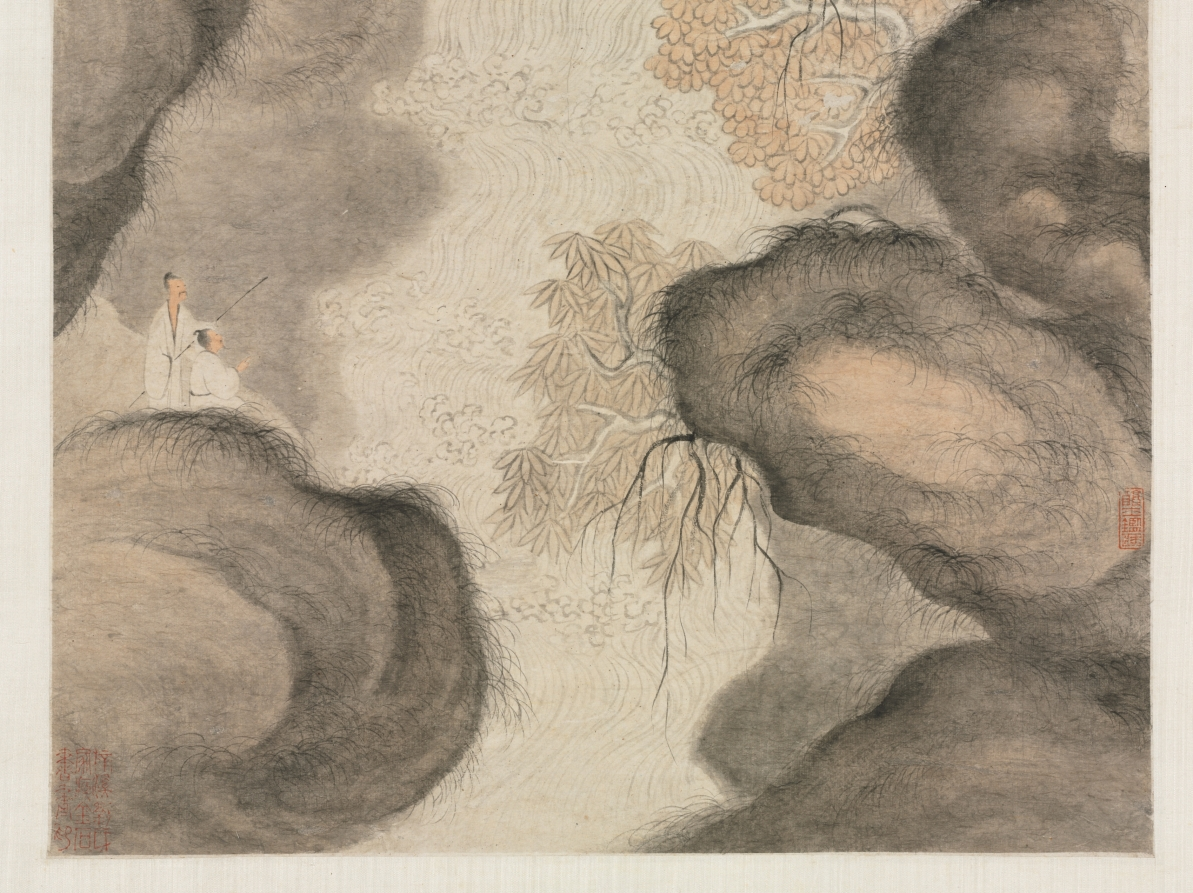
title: Nine Dragon Pool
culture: China, Qing dynasty (1644-1911)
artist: Mei Qing (Chinese, 1623–1697)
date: 1690s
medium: hanging scroll, ink and light color on paper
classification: Painting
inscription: 太古蟄龍醒，蠺叢霹靂開。 五溪雲不去，三峽雪飛來。 瞿山, 清。 [印] 梅清; 淵公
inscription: 2 additional seals: 1 of Dai Xi 戴煕 (1801–1860); 1 unidentified.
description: In the second half of the 1600s, Huangshan 黃山 (Mt. Huang or Yellow Mountain) attracted many visitors and inspired artists like Mei Qing. He probably sketched the Nine Dragon Pool on his second trip to the mountain range in 1690, at the advanced age of 68 sui. This dramatic waterfall has nine curves, each forming an emerald green pool. After heavy rain, the rushing water looks like nine white dragons.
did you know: Huangshan 黃山 is a UNESCO World Heritage site known for its spectacular rocky peaks, sea of clouds, oddly shaped pine trees, and hot springs.